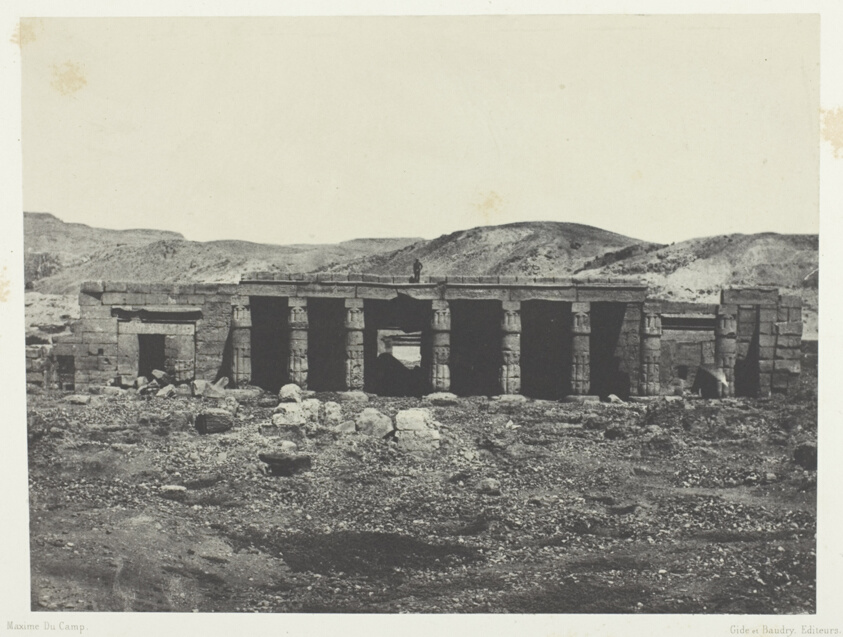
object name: Photograph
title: Gournah, Palais de Ménephta 1er; Thèbes, plate 61 from the album "Egypte, Nubie, Palestine et Syrie" (1852)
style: 19th century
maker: Maxime Du Camp (French, 1822–1894)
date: 1849/51, printed 1852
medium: Salted paper print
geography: France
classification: salted paper print; photographic process; photography; photograph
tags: Collected by Hugh Edwards, Egypte, Nubie, Palestine et Syrie